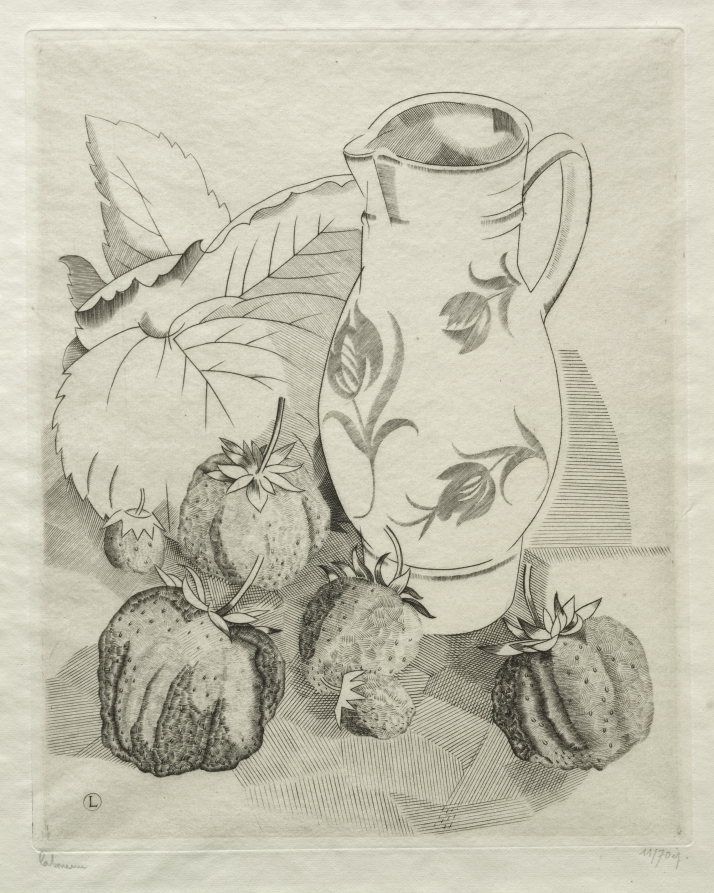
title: Strawberries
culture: France, 20th century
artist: Jean-Émile Laboureur (French, 1877–1943)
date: 1924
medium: engraving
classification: Print